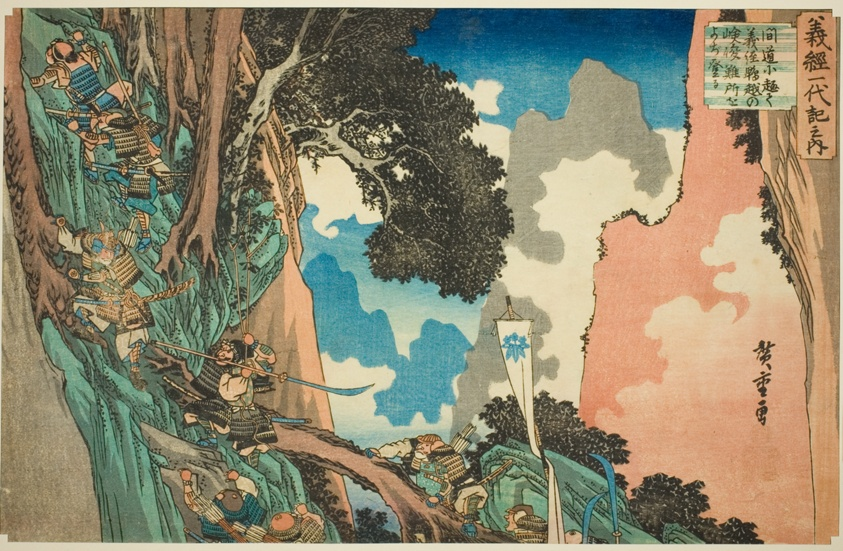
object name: Print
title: No. 5: Yoshitsune Takes a Shortcut and Scales the Steep and Dangerous Precipice at Hiyodori Pass (Gokai, Kando ni omomuku Yoshitsune Hiyodori goe no kenshun nansho o yojinoboru), from the series "The Life of Yoshitsune (Yoshitsune ichidaiki no uchi)"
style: Japanese (culture or style)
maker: Utagawa Hiroshige 歌川 広重; Japanese, 1797-1858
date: c. 1832/34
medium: Color woodblock print; oban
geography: Japan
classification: woodblock print; print; asian art